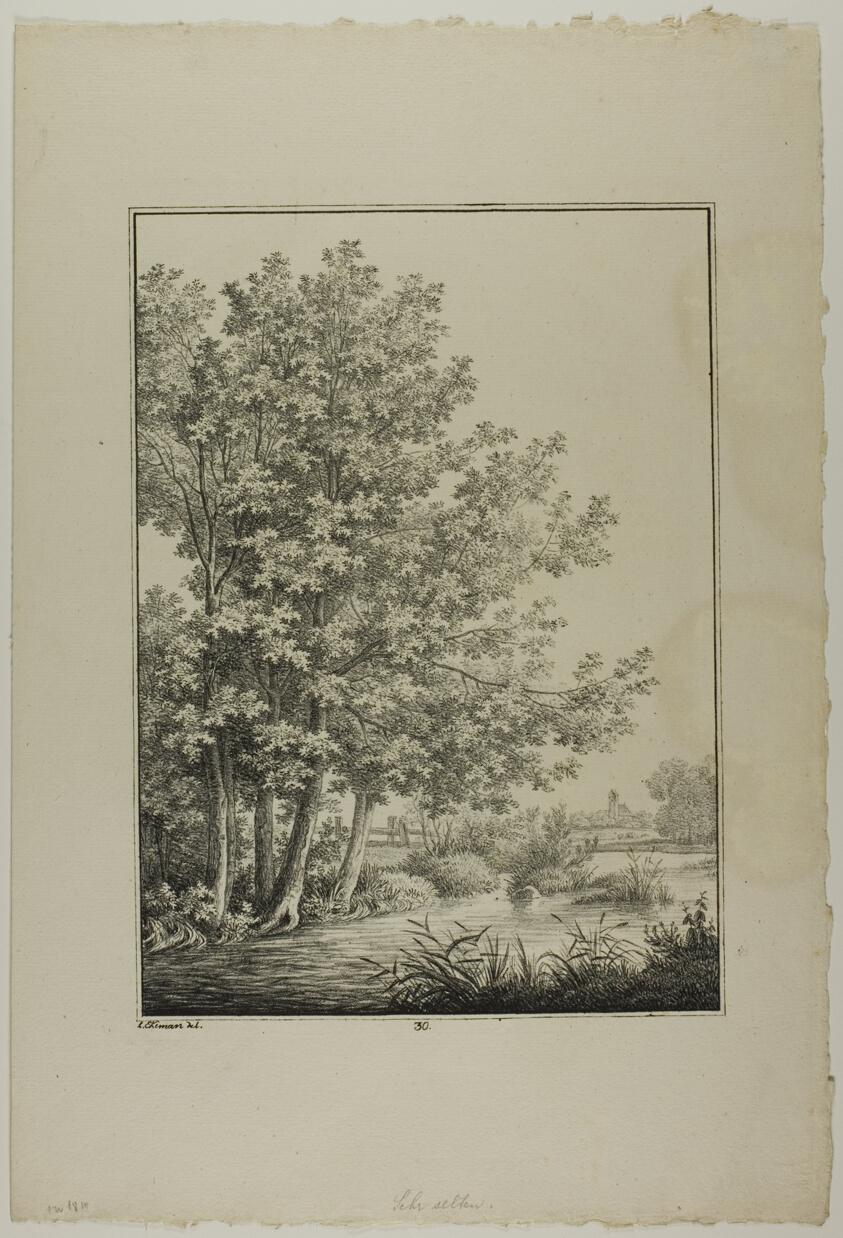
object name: Print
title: Plate 30 from Blatt Baum und Landschafts Studien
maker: Lorenz Ekemann Alesson (Swedish, 1791-1828)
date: c. 1810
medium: Lithograph on paper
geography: Sweden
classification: lithograph; print; prints and drawing